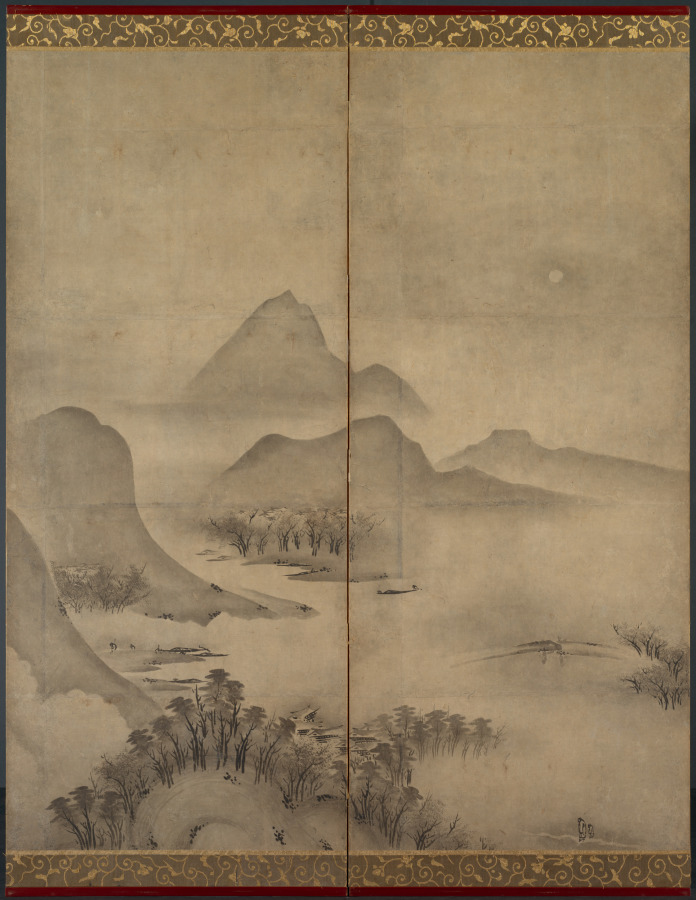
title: Moonlit Landscape (one of a pair)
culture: Japan, Muromachi period (1392–1573)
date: late 1500s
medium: six-panel folding screen, ink on paper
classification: Painting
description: This unsigned and unsealed composition includes imagery from the Eight Views of the Xiao and Xiang Rivers. Scanning the composition from right to left, four of the Eight Views subjects appear: sunset glow over a fishing village, returning sails off a distant shore, autumn moon over Lake Donting, and evening bell from a mist-shrouded temple. Not all the elements of the traditional Eight Views theme are here, but the artist suggests its literary presence by leading the viewer through a summer’s journey from one day to the next, aided, like the travelers in the landscape, by the light of the moon.